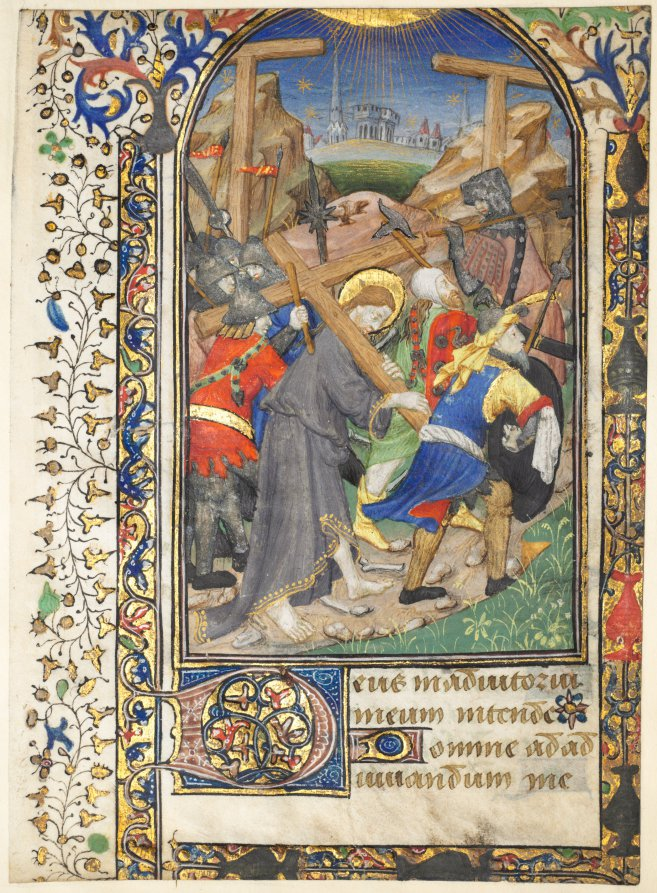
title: Leaf Excised from the Tarleton Hours: Christ Carrying the Cross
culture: Northern France, Normandy, Rouen?, 15th century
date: c. 1430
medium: ink, tempera, silver, and gold on vellum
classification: Manuscript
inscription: Deus in adiutorium meum intende. Domine ad adiuvandum me…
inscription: Festina. Gloria Patri, et Filio: et SSpiritui Sancto, Sicut erat in Principio. Memento salutis auctor. Quod nostri quondam corporis, Ex illibata virgine Nascendo, formam sumpseris. Ad Dominum cum tribularet, clamavi: et exaudivit me. Domine libera animam meam a labiis iniquis: et a lingua dolosa. Quid detur tibi, aut quid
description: Although the Hours of the Virgin are traditionally illustrated with scenes from the early life of Christ, sometimes the Passion of Christ, or the events leading up to and immediately after the Crucifixion, are used. This scene of Christ carrying the cross, used for the sixth hour (Sext), is placed between a scene of flagellation, or beating, and the Crucifixion. This book of hours uses the feminine pronoun in prayers, indicating that it had a female owner.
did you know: The images and decorated initials in the book helped users navigate to sections they needed.